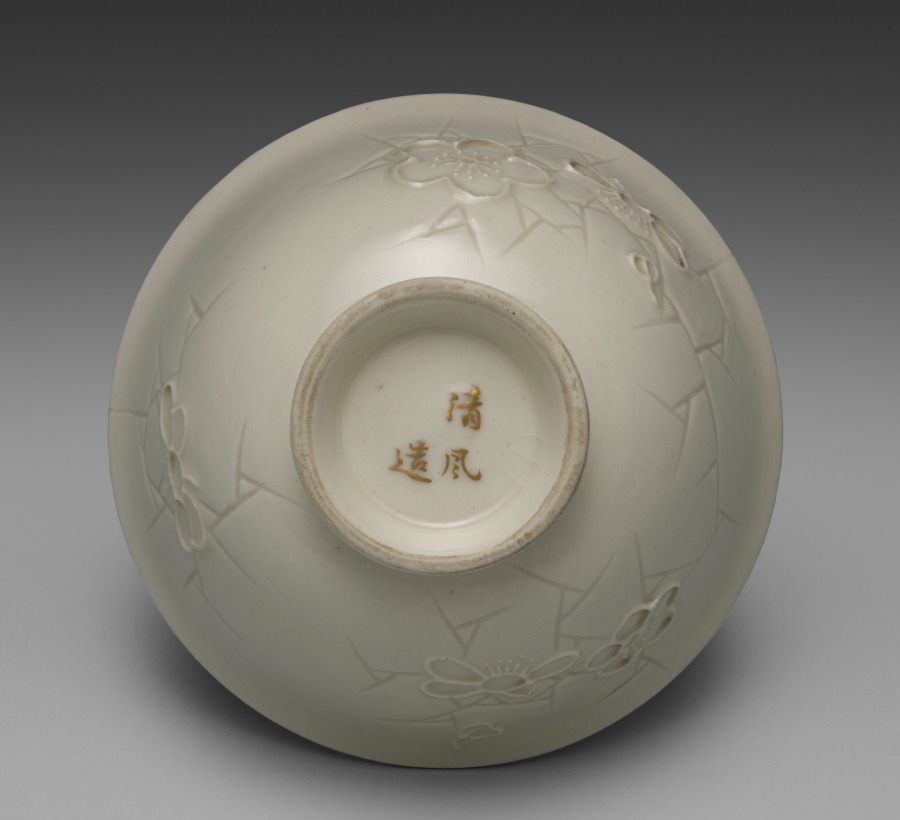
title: Bowl from Dining Set with Plum Blossoms and Cracked-Ice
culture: Japan, Meiji period (1868–1912)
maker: Seifū Yohei II (Japanese, 1844–1878)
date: c. 1875–78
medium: Porcelain with molded designs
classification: Ceramic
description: Each item in this set has a delicate low-relief design of flowering plum branches over scattered, intersecting lines meant to resemble the cracked-ice surface of a frozen body of water and is signed on the base in gold pigment. While Yohei II produced many fine works in underglaze blue, like those produced by Kiyomizu Shichibei, he also made works in quite different styles later in his career, from the early 1870 s. In 1873, he was appointed purveyor to the Industrial Center of Kyoto Prefecture, a designation associated with Kyoto’s efforts to reach an international market through the port of Kobe; and from 1875 until his death, he was involved in national-level projects to present Japanese ceramics across the world. It was during this period that Yohei III was apprenticed to Yohei II, and it has been suggested that this set may in fact be an early example of Yohei III’s work, which he signed with his teacher’s name. Decorated with flowers resembling Japanese textile motifs, the set calls to mind the design of Yohei II’s pair of vases with plum blossoms in the Victoria and Albert Museum. Here, the elaborate trees created for a formal public exhibition setting have been translated into the approachable blossoms of the genteel domestic environment. While the designs are consistent across the pieces, each raised flower petal and pistil and each incised line in the ice was done by hand, so the cups, bowls, and dishes are similar yet unique. The bottoms of two boxes once identified the set’s owner, but the information has been deliberately obscured with black ink. However, inscriptions still visible appear to indicate two occasions, once at the end of July 1886 , and once again in June 1916 , when parts of the set were requested from Hokura in Niigata Prefecture. The location corresponds to a neighborhood in the present-day city of Jōetsu. The surname Tsuji 辻 also appears on a paper tag affixed to one of the box cloths. Future research may possibly reveal more about their provenance. A vase by Yohei III in a private collection combines the formal grandeur of the Yohei II vases in the Victoria and Albert Museum with the gentler design of this dining set, placing flowering plum trees against soft, scalloped-edge clouds resembling those in golden screens.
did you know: The dining wares have a creamy white coloration that the four boxes containing them identify as Korean in style.